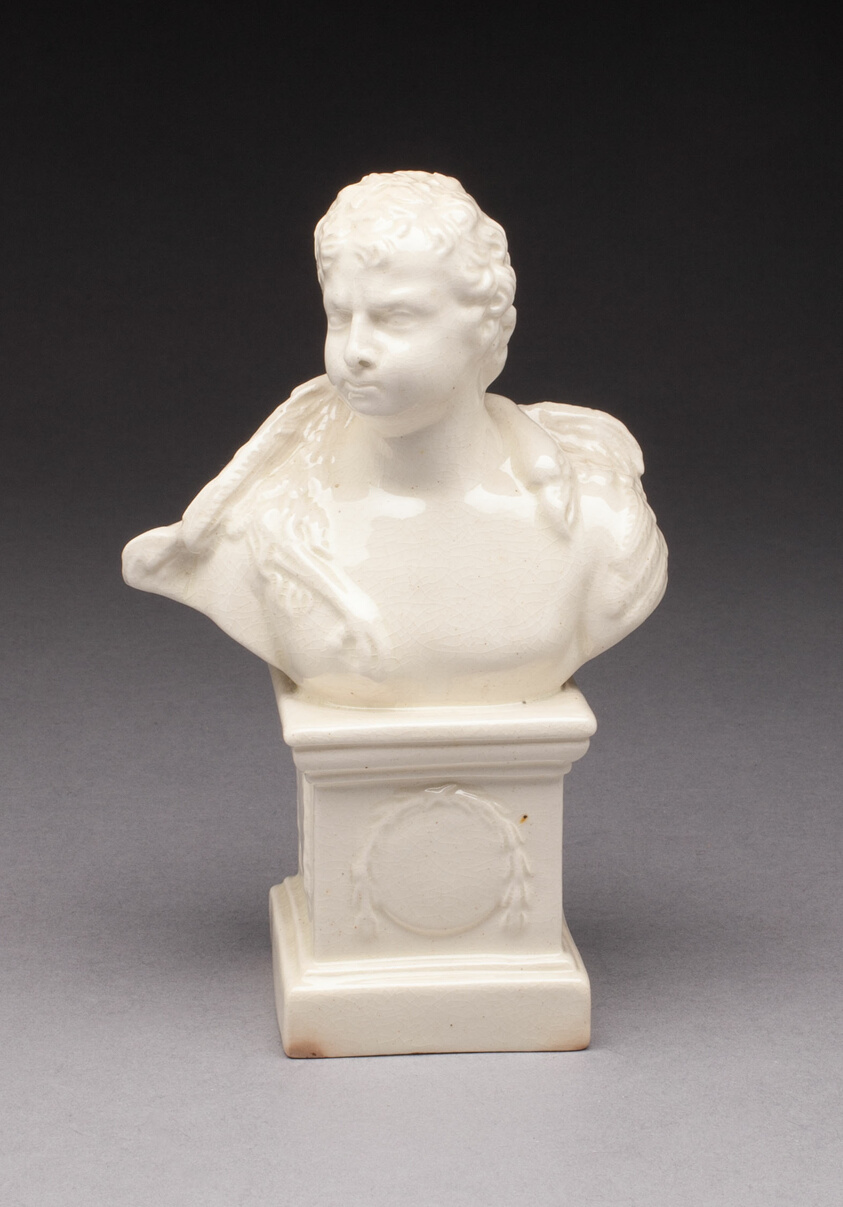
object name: Ceramics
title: Bust of a Man Draped with a Swan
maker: Leeds Pottery; English, founded 1756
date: 1780/90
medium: Lead-glazed earthenware (creamware)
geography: Yorkshire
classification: earthenware; european decorative arts; ceramics; creamware; lead-glazed earthenware